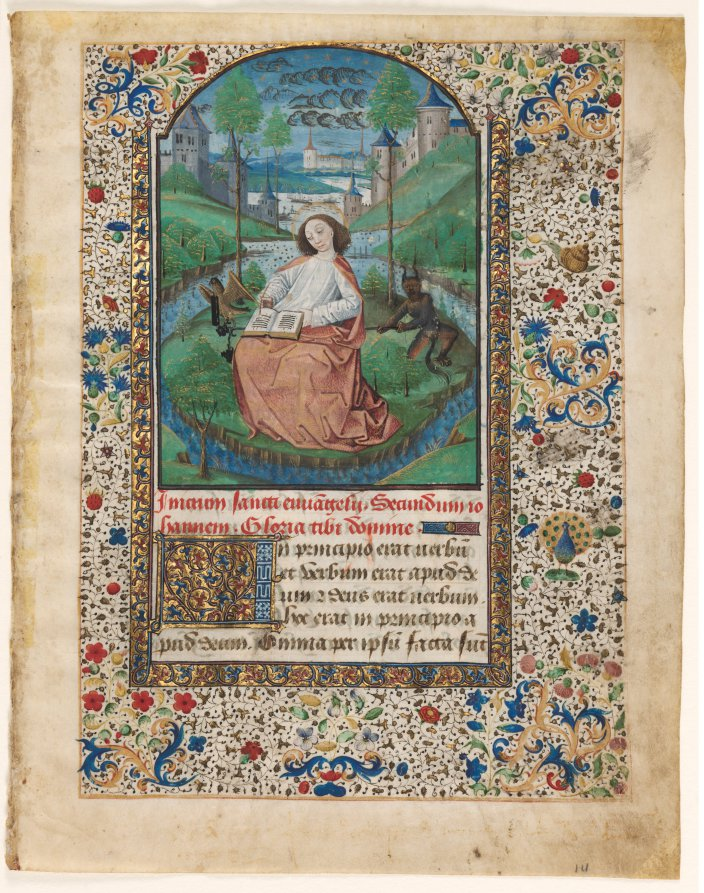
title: Leaf from a Book of Hours: John on Patmos (1 of 2 Excised Leaves)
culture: France, Eastern France or Paris (?), 15th century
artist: Master of Jacques de Luxembourg (French)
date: c. 1465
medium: ink, tempera and gold on vellum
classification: Manuscript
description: The miniature of St. John comes from a cycle of evangelist portraits forming the lessons following the calendar. The Evangelist John is shown seated on the Island of Patmos, to which he was banished by the Roman Emperor Domitian. It was here, as tradition has it, that John composed his Book of Revelation. A common motif is the inclusion of a mischievous devil who attempts to distract the saint from his sacred work by stealing his ink bottle. The Master of Jacques de Luxembourg had a strong sense of visual detail, particularly in architecture, which he typically combined with a flair for narrative. This points to his origin in eastern France or Flanders, though he may have actually worked in Paris.